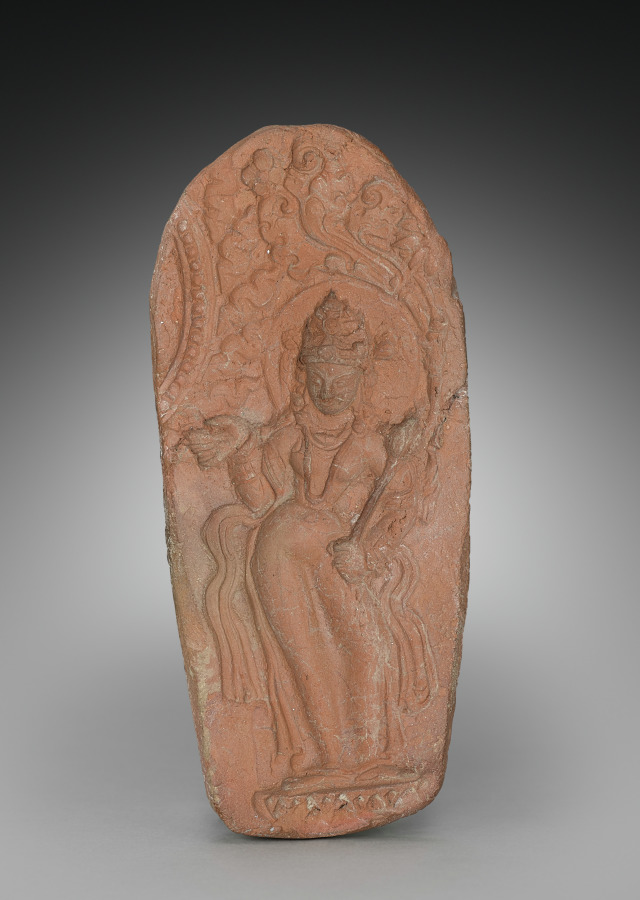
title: Mould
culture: India, Kashmir, 8th-9th Century (?)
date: 700s-800s(?)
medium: terracotta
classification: Ceramic